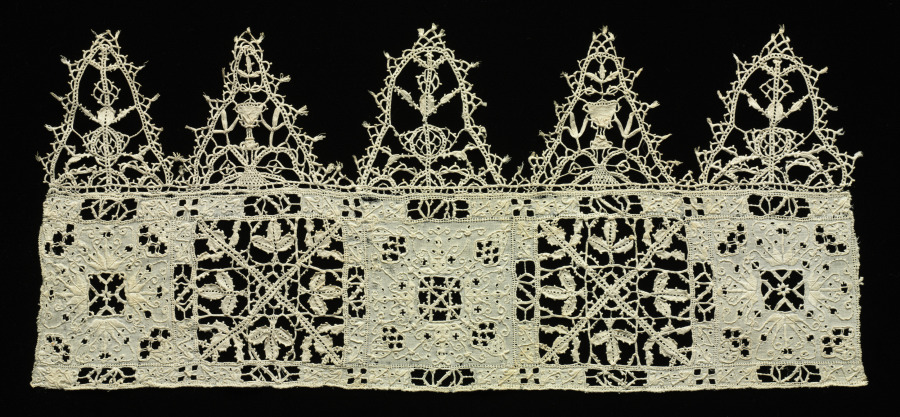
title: Lace Edging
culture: Italy, Venice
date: 1560–99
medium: Linen: needle lace (cutwork) and embroidery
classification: Lace